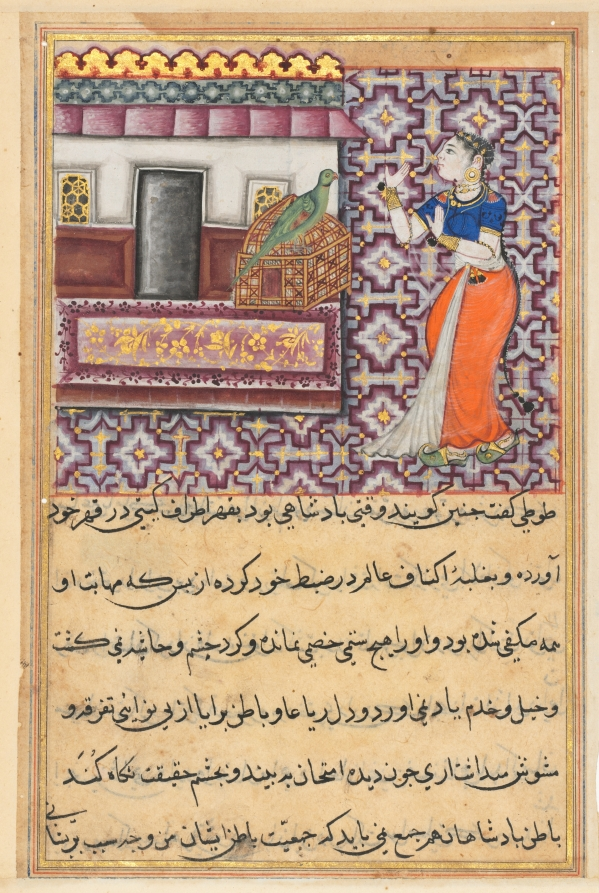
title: The parrot addresses Khujasta at the beginning of the fiftieth night, from a Tuti-nama (Tales of a Parrot): Fiftieth Night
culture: Mughal India, court of Akbar (reigned 1556–1605)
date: c. 1560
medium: gum tempera, ink, and gold on paper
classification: Painting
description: As the sun sets on the fiftieth night, Khujasta attempts to leave to visit her lover. She is stopped by Tuti, the clever talking parrot, who begins to tell a story about the princess of Rum and the anguish caused by her son. The parrot’s tale lasts until sunrise, and Khujasta is again unable to meet with her lover.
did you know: Rum is the Arabic name for Rome.